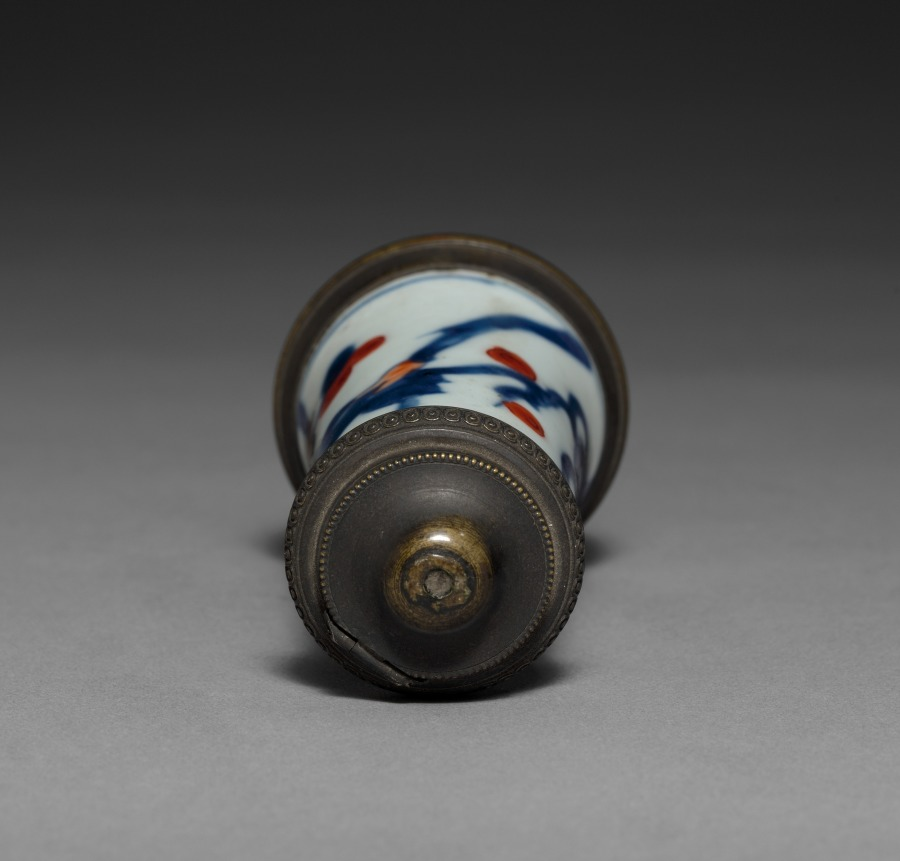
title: Imari Ware (?) Container with Brass Mounts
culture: Japan, Edo period (1615–1868)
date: late 1600s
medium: porcelain with brass mounts (possibly Hizen ware, Arita type, Imari style)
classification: Ceramic